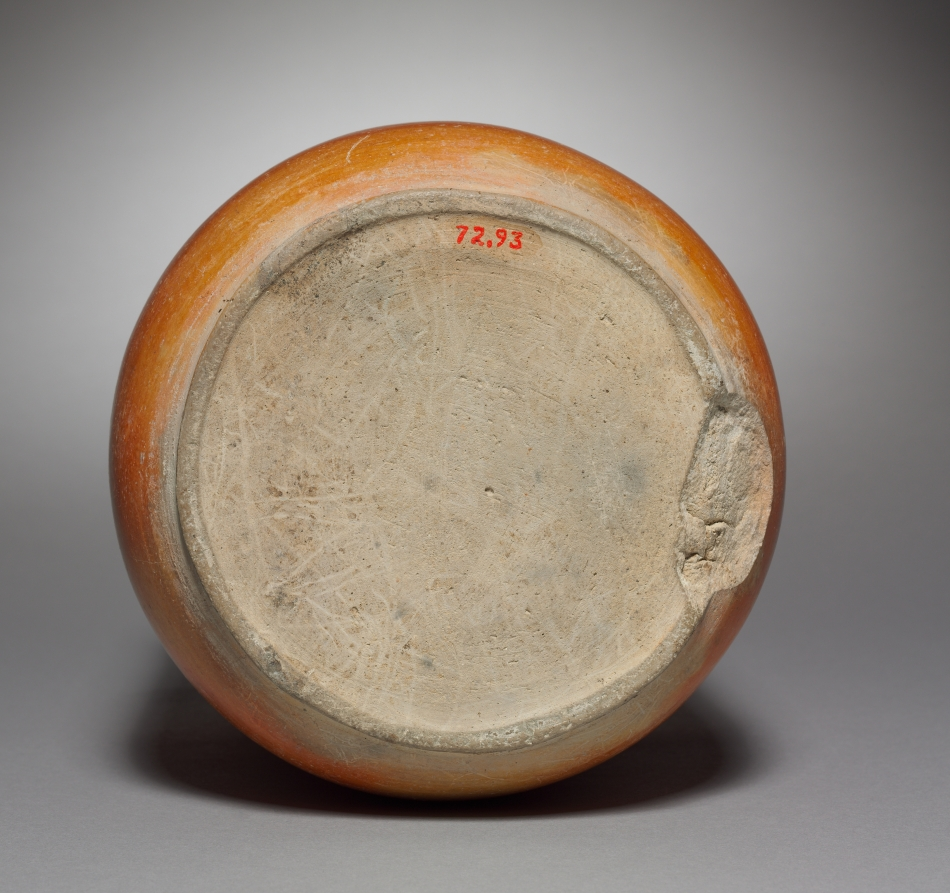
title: Vase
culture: Mexico, Maya, Campeche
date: 250–900 CE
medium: earthenware with colored slips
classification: Ceramic